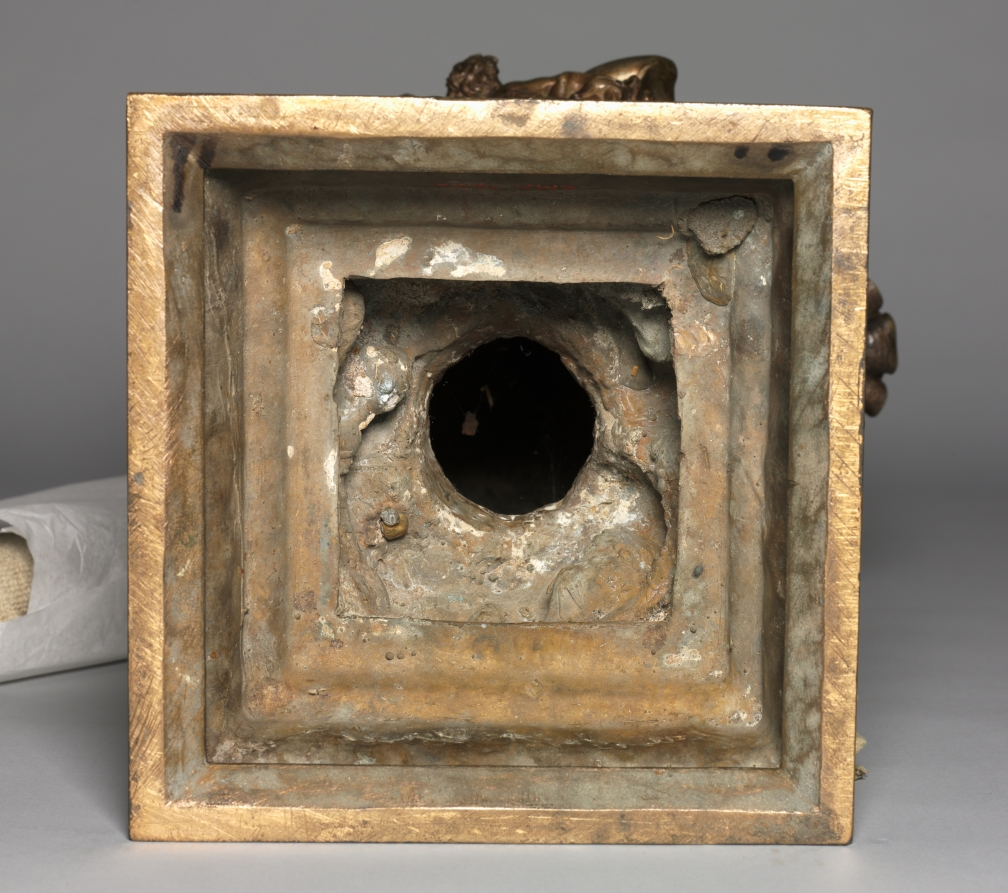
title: Ewer with Triumph of Galatea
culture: Italy, Florence, late 17th-early 18th Century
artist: Massimiliano Soldani (Italian, 1656–1740)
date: c. 1700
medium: bronze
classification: Sculpture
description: Upon discovering the sea nymph Galatea's infidelity, her betrothed, the Cyclops Polyphemus, pulverizes her lover Acis with a rock. In grief, Galatea turns his blood into a river and Acis becomes god of that river, which bears his name. Here Galatea escorts a swarm of sea creatures in celebration of Acis's apotheosis.